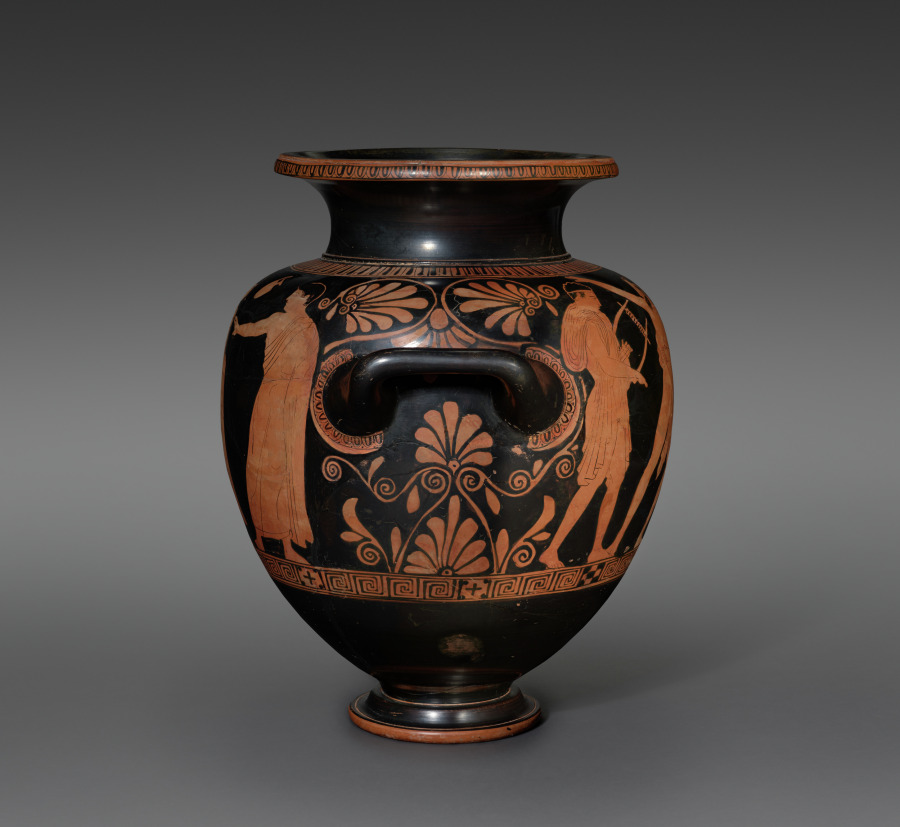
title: Red-Figure Stamnos (Mixing/Storage Vessel): Komos (Musicians and Revelers)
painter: attributed to Kleophon Painter (Greek, Attic, active c. 440–410 BCE)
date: c. 435–425 BCE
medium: Ceramic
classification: Ceramic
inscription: Κ Α Λ Ο Σ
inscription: Κ Α Λ Ο [Σ]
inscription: black '080'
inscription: black 'WF2'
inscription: black '0.19'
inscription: red '09.6'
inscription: partially removed red and white sticker, with number blacked out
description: Four lively figures move to the right across the front side of this stamnos, a vase used for storing and mixing wine. First comes a finely dressed woman playing the pipes, followed by three male figures, all nearly nude. The bearded one holds a drinking cup and reaches back, perhaps dancing, while the last in line concentrates on the music of his lyre.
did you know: The Athenian stamnos, a shape favored by the Etruscans, was made primarily for export.